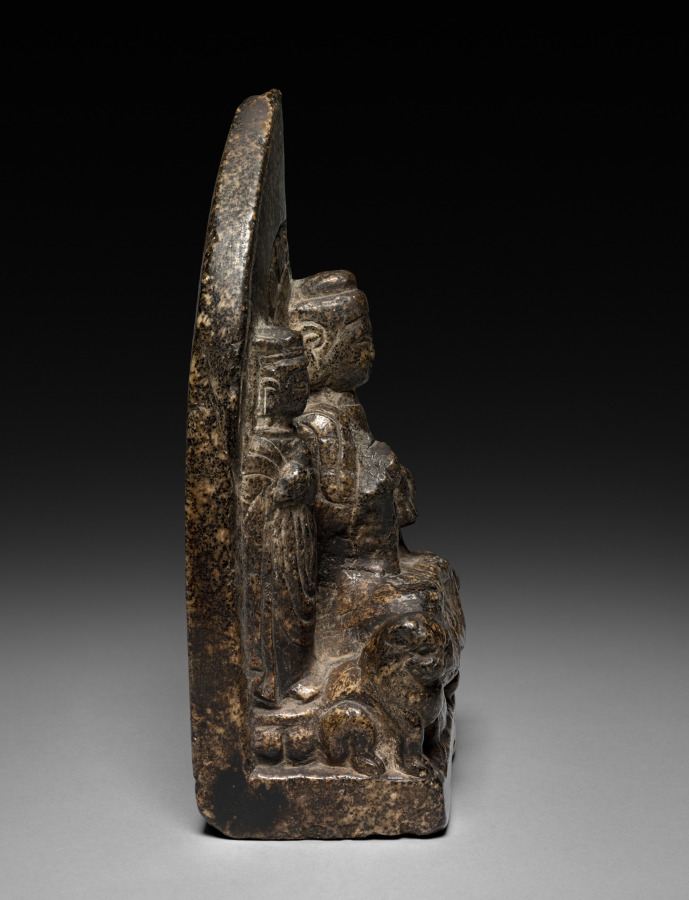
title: Buddha Triad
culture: China, Northern Dynasties period (386–581 CE), Northern Zhou (557-581)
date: 568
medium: stone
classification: Sculpture